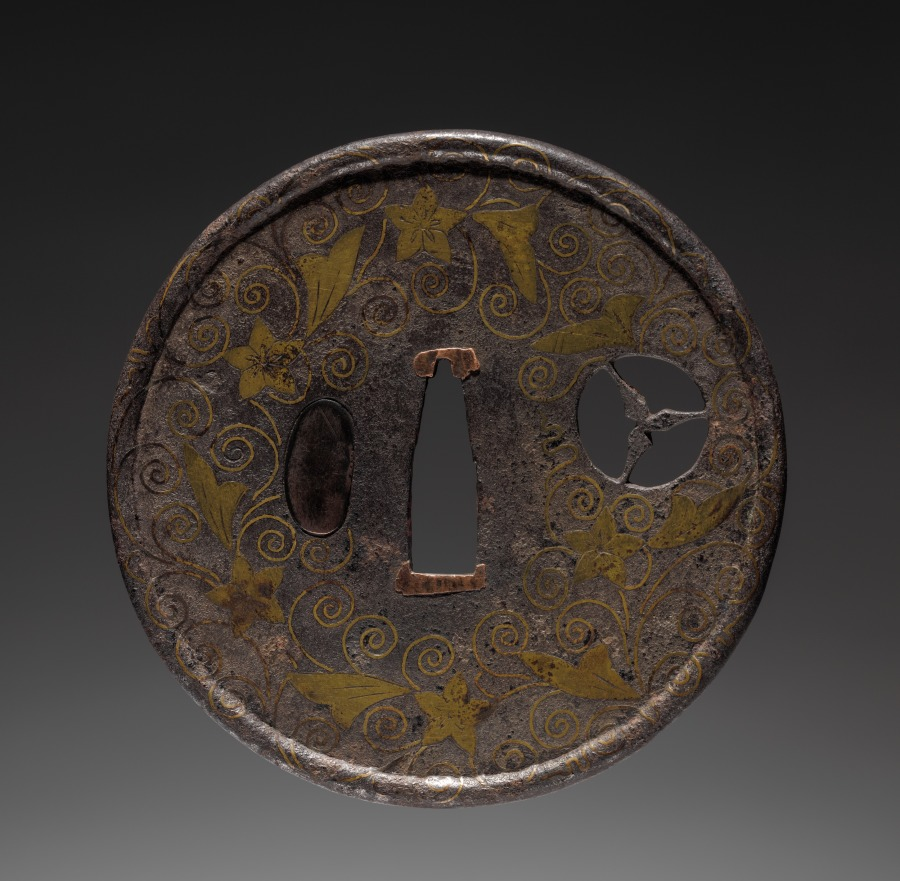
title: Sword Guard (Tsuba)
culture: Japan, possibly Edo period (1615-1868)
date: c. 1615–1868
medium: iron with brass inlay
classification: Arms and Armor